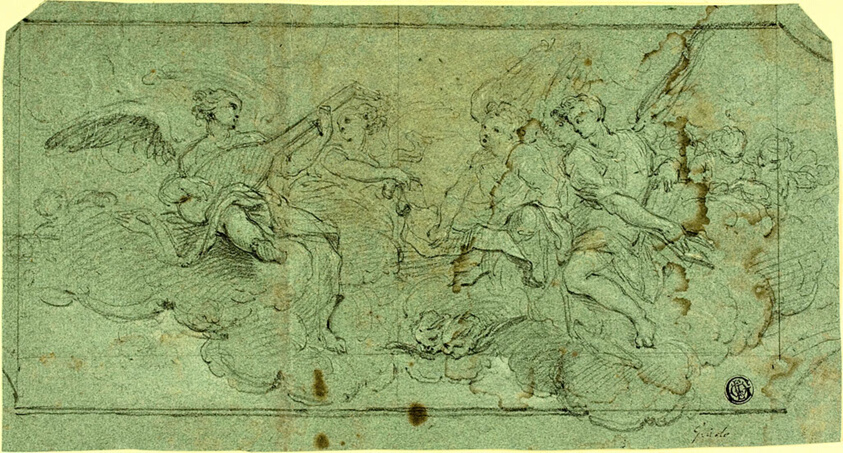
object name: Drawing and Watercolor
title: Musician Angels in Clouds (recto); Seated Cleric (verso)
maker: Possibly Guido Reni; Italian, 1575-1642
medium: Black chalk, heightened with traces of white chalk (recto and verso), on blue laid paper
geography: Italy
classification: chalk; drawings (visual works); prints and drawing